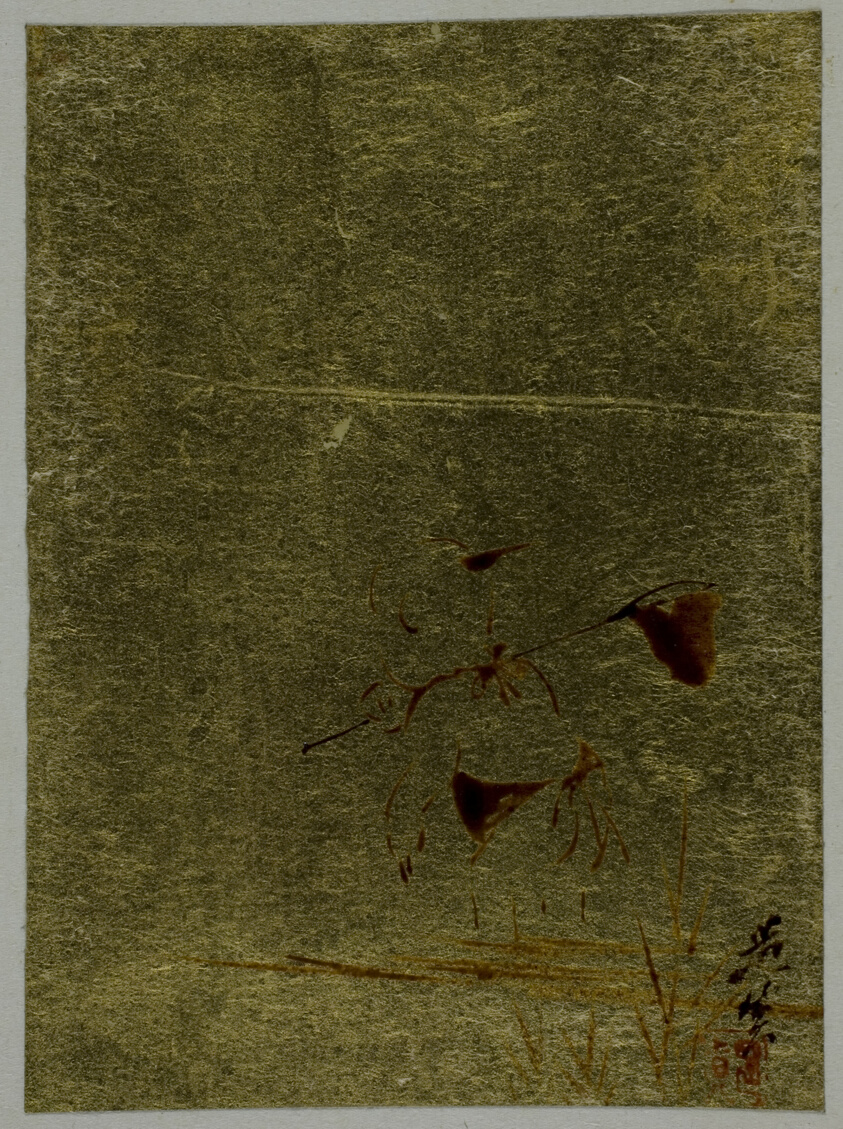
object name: Painting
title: Youth with Fish Net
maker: Shibata Zeshin (Japanese, 1807-1891)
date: Meiji period (1868–1912)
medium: Album leaf, inks and color on paper.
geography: Japan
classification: album leaf; album/sketchbook; asian art; painting